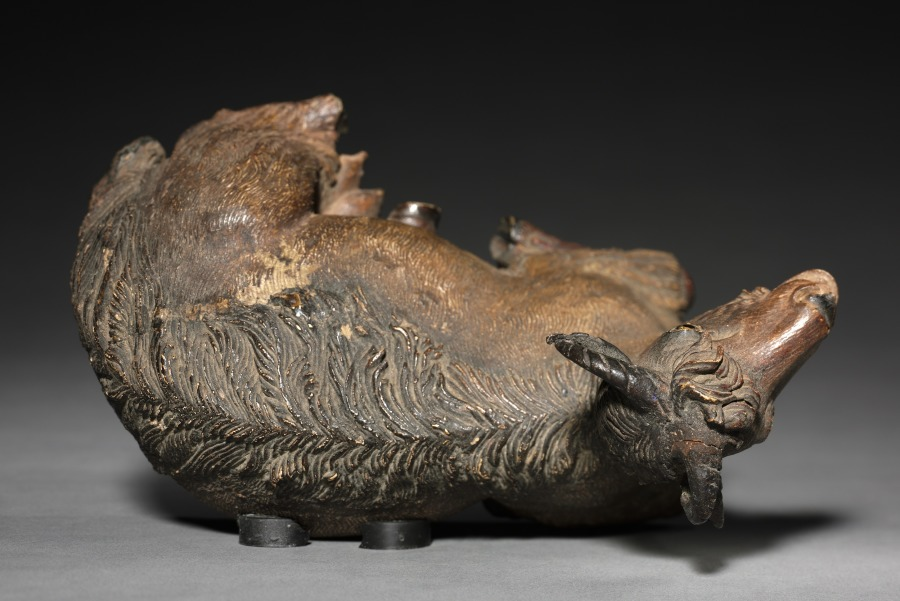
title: Figure from a Crèche: Sitting Ram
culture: Italy, Naples, late 18th-early 19th century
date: 1780–1830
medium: painted terracotta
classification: Sculpture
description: The practice of creating scenes of the Nativity for the home dates from the early 1700s in Italy, where people began to set up doll-like figures of about a foot or less in height. The custom was particularly popular in Naples around 1800, where crèche scenes (crèche means cradle, or crib) included many figures, whose heads and hands of painted terracotta, stuffed cloth bodies, and clothing adapted from contemporary local costumes gave them an amazingly realistic character. Representations of the birth of Jesus can be traced to the first few centuries of Christianity. Both living creatures and sculptural depictions of them were used from early times. By the late middle ages it was customary to create life-size figures of wood or stone, naturalistically painted, to represent the characters who participated in the events of Jesus's early life. These sculptures were then arranged in scenes illustrating one or both of the most important of these events, the Adoration of the Shepherds and the Adoration of the Magi-the three kings from the East who came to pay homage to the Christ child. Used in churches, these large figures were especially popular in Italy, Central Europe, Spain, and Portugal. This Object in Focus presentation was organized by Henry Hawley, Curator of Renaissance and Later Decorative Arts and Sculpture.